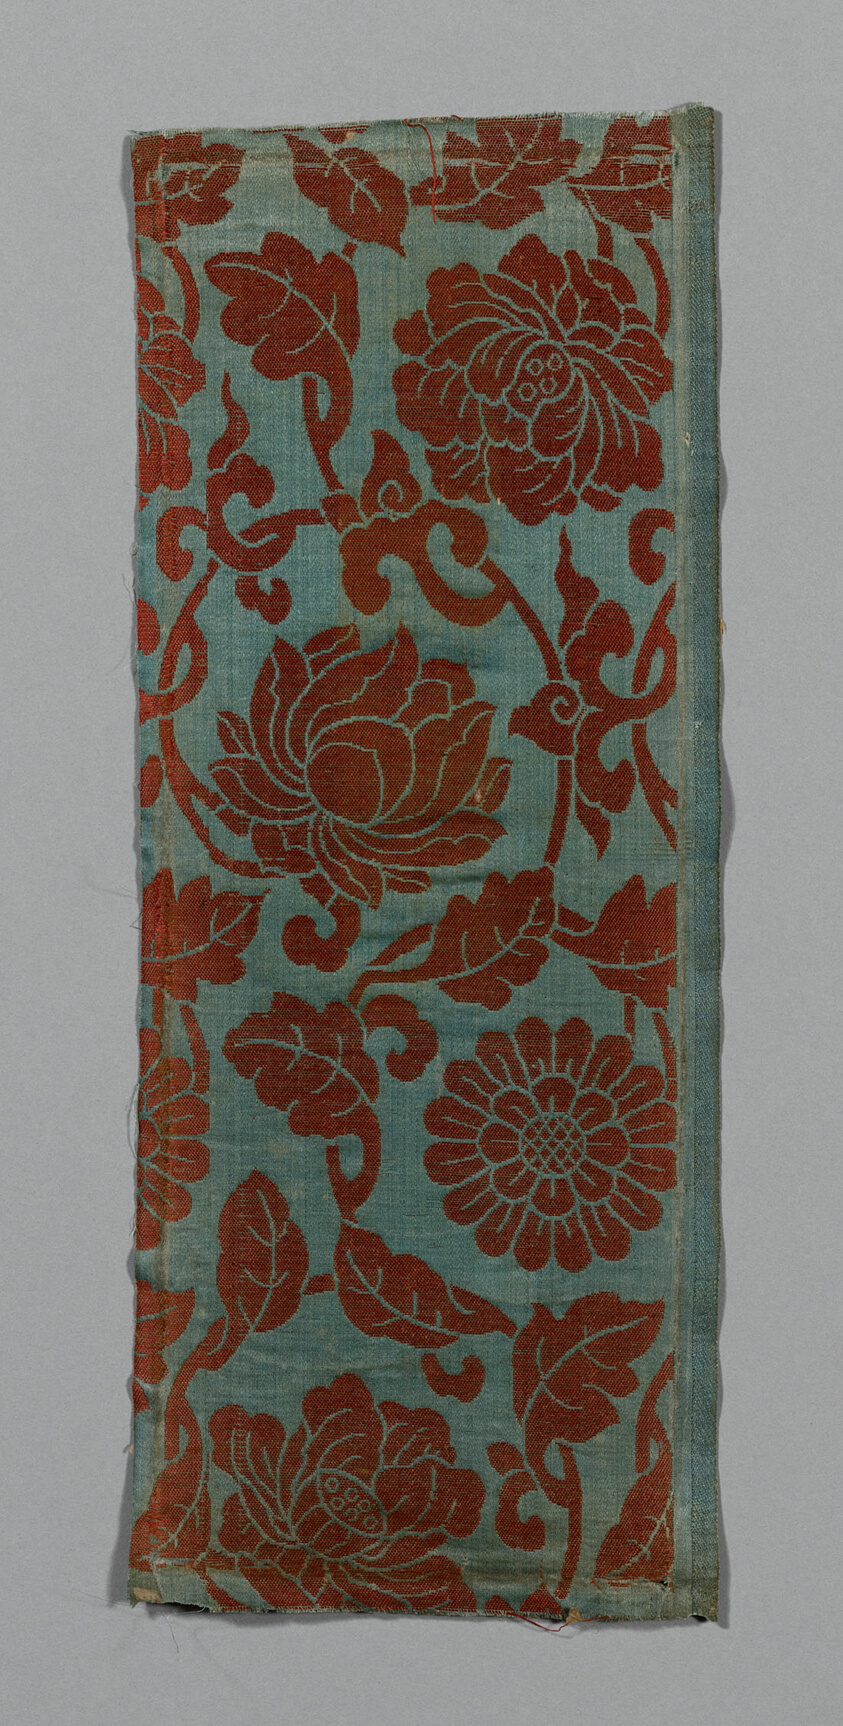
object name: Textile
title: Sutra Cover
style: ming, Chinese (culture or style), East Asian, asian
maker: China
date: Ming dynasty (1368–1644), c. 1590s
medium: Silk, warp-float faced 4:1 satin weave with supplementary patterning wefts bound in weft-float faced 1:4 satin interlacings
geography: China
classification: textile; weaving